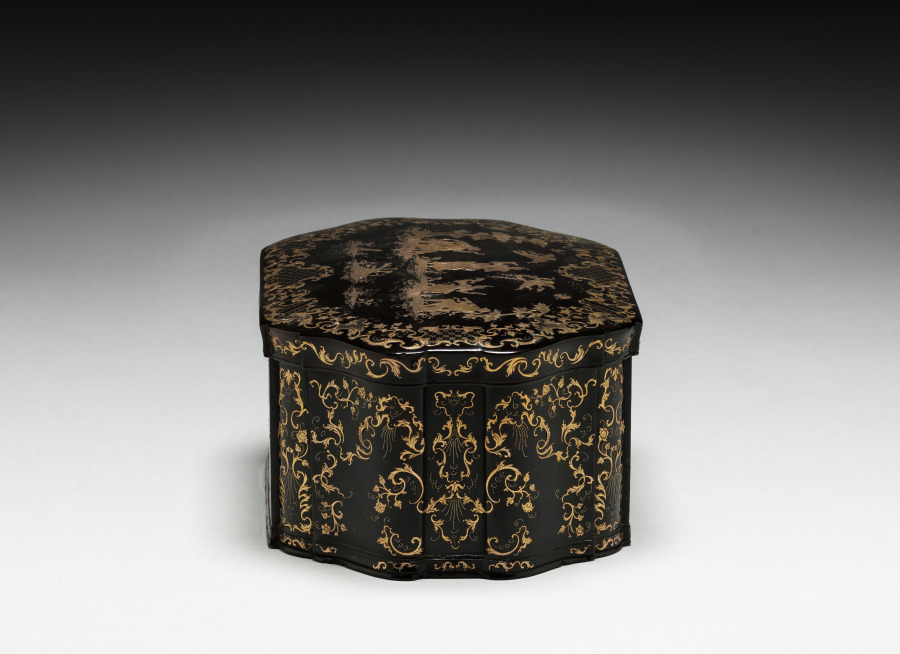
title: Box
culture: Italy, Naples (?), 18th century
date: c. 1750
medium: tortoise shell and gold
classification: Miscellaneous